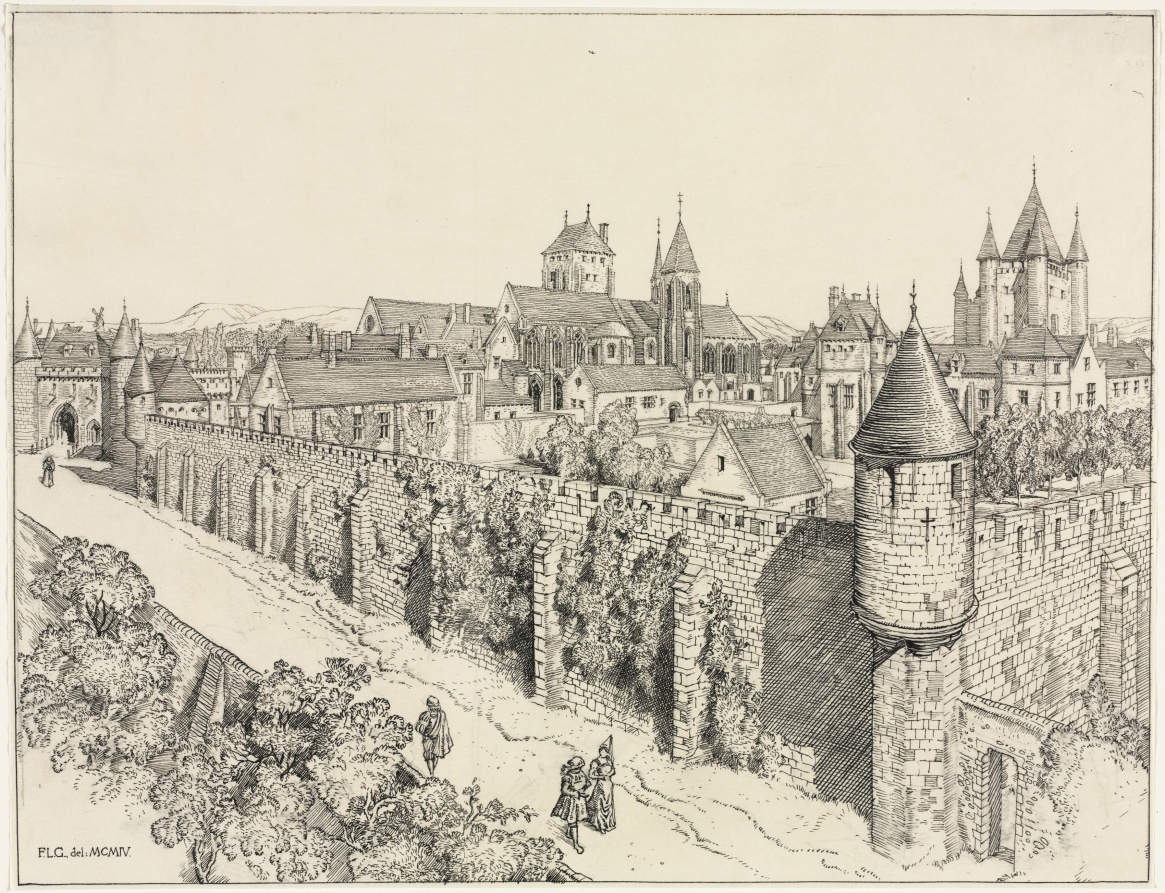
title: The Temple, Paris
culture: England, 20th century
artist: Frederick Landseer Maur Griggs (British, 1876–1938)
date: 1904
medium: ink and graphite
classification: Drawing